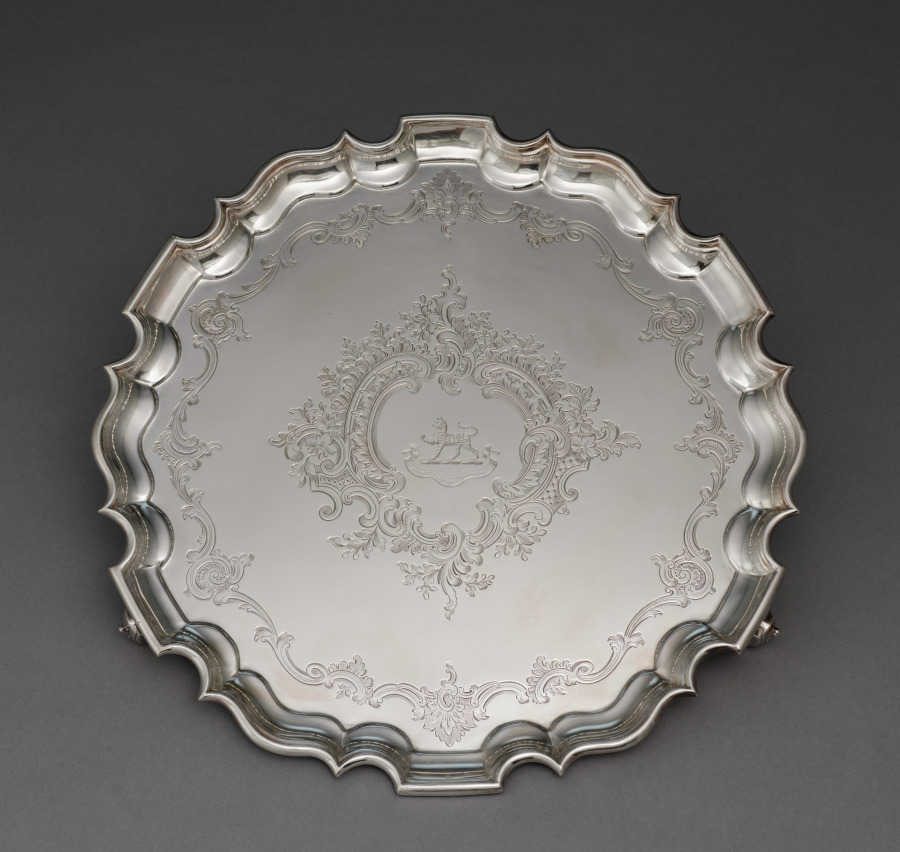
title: Salver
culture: England, London, 20th century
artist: Goldsmiths & Silversmiths Co. (British)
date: c. 1910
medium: silver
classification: Silver